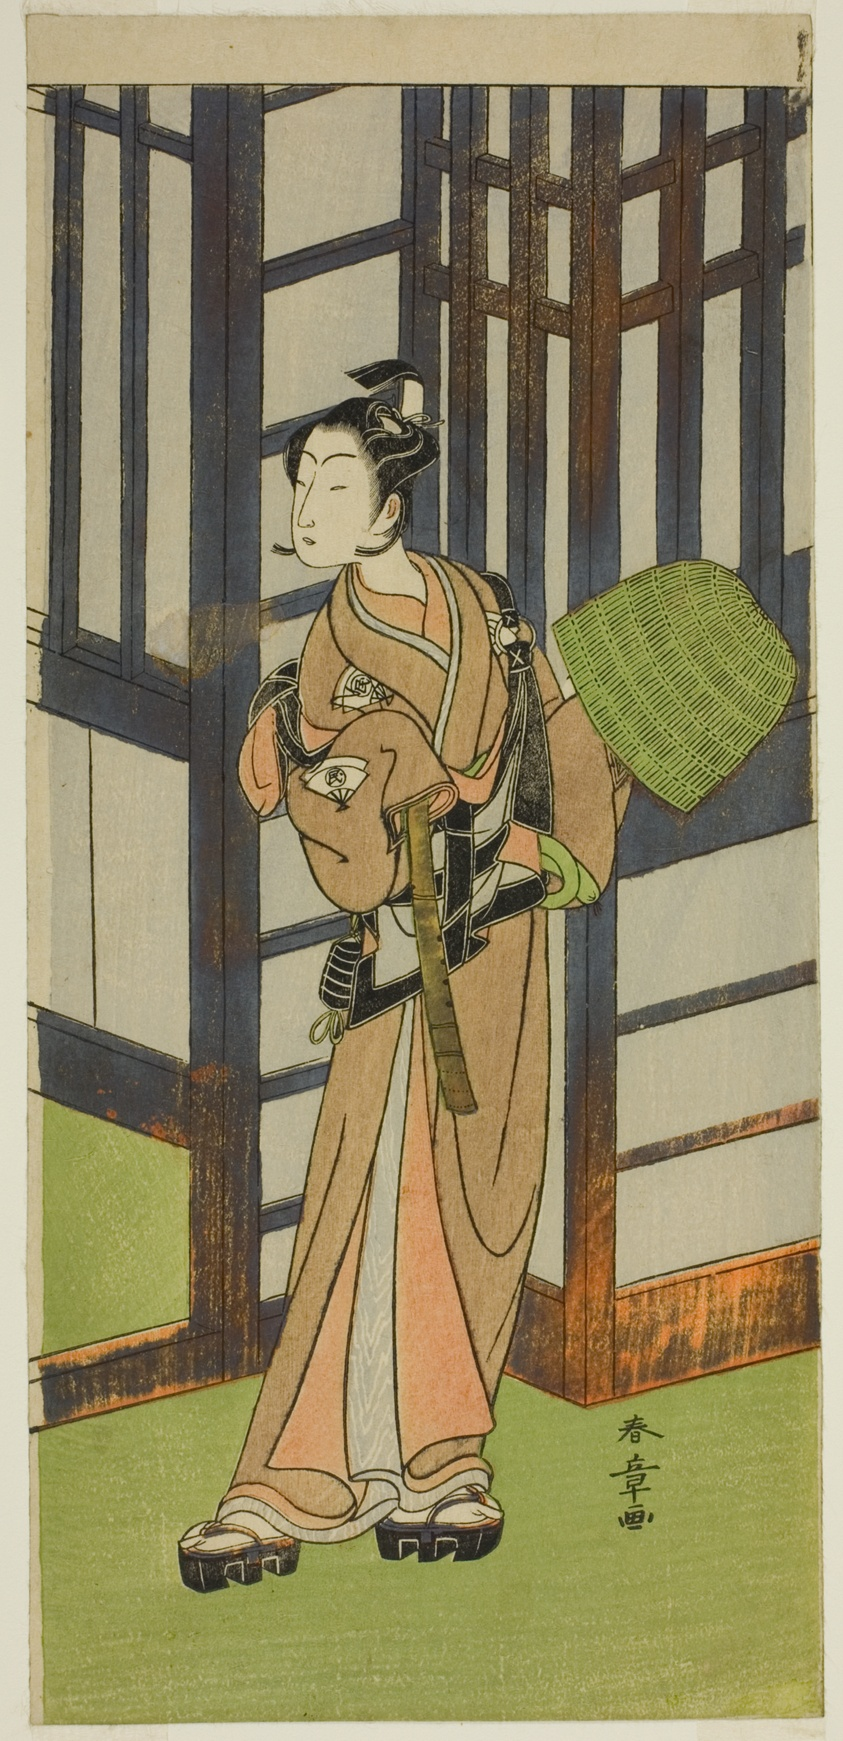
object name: Print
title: The Actor Onoe Tamizo I as Kewaizaka no Shosho Disguised as a Komuso in the Play Furisode Kisaragi Soga, Performed at the Ichimura Theater in the Second Month, 1772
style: Japanese (culture or style)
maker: Katsukawa Shunsho 勝川 春章; Japanese, 1726-1792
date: c. 1772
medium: Color woodblock print; hosoban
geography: Japan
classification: woodblock print; print; asian art